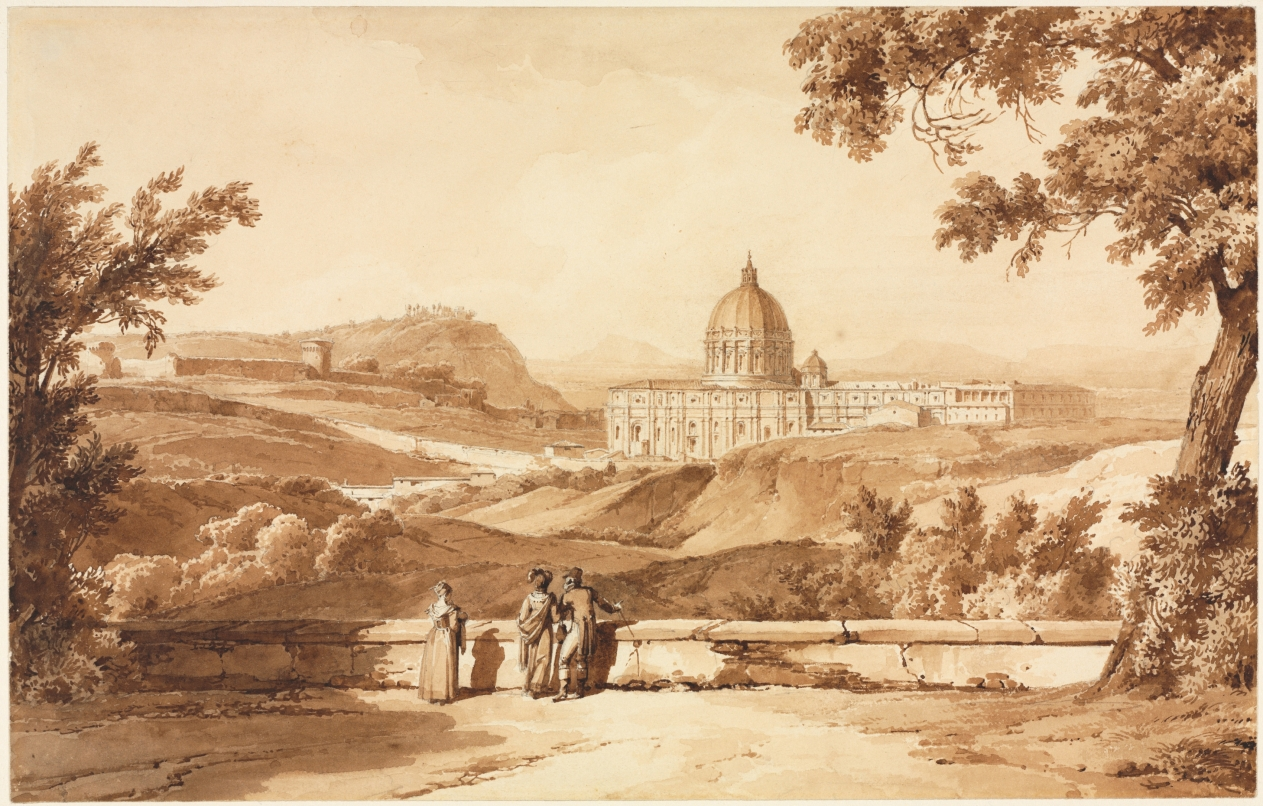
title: View of St. Peters, Rome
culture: France, 19th century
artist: Achille Etna Michallon (French, 1796–1822)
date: c. 1817–20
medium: Pen and brown ink and brush and wash over graphite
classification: Drawing